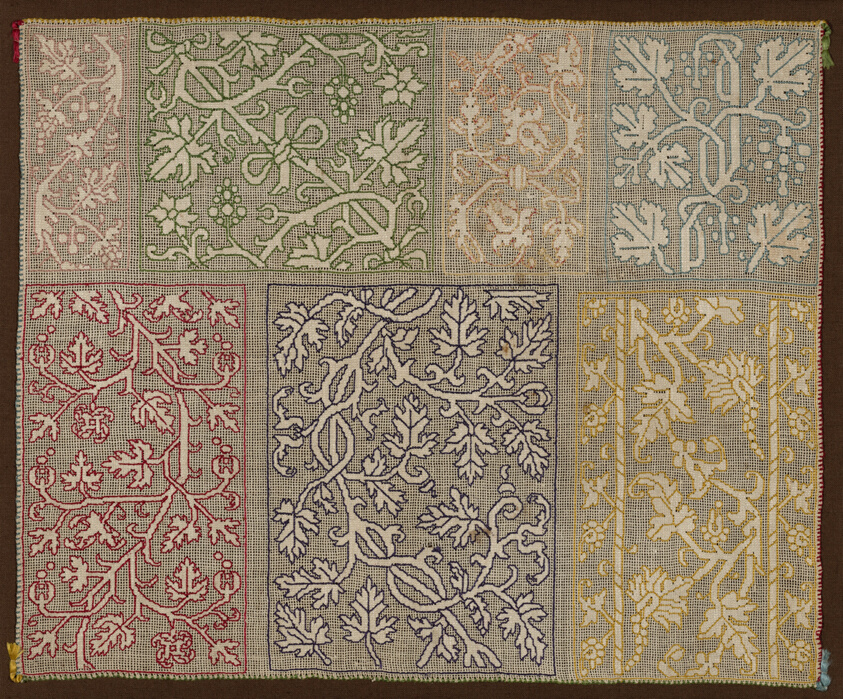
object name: Textile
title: Sampler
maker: Italy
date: 17th century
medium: Linen, plain gauze weave; embroidered with silk floss and linen in double running, stem, weaving, and buttonhole stitches; applied silk tassels at each corner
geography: Italy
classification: textile; needlework (visual works)